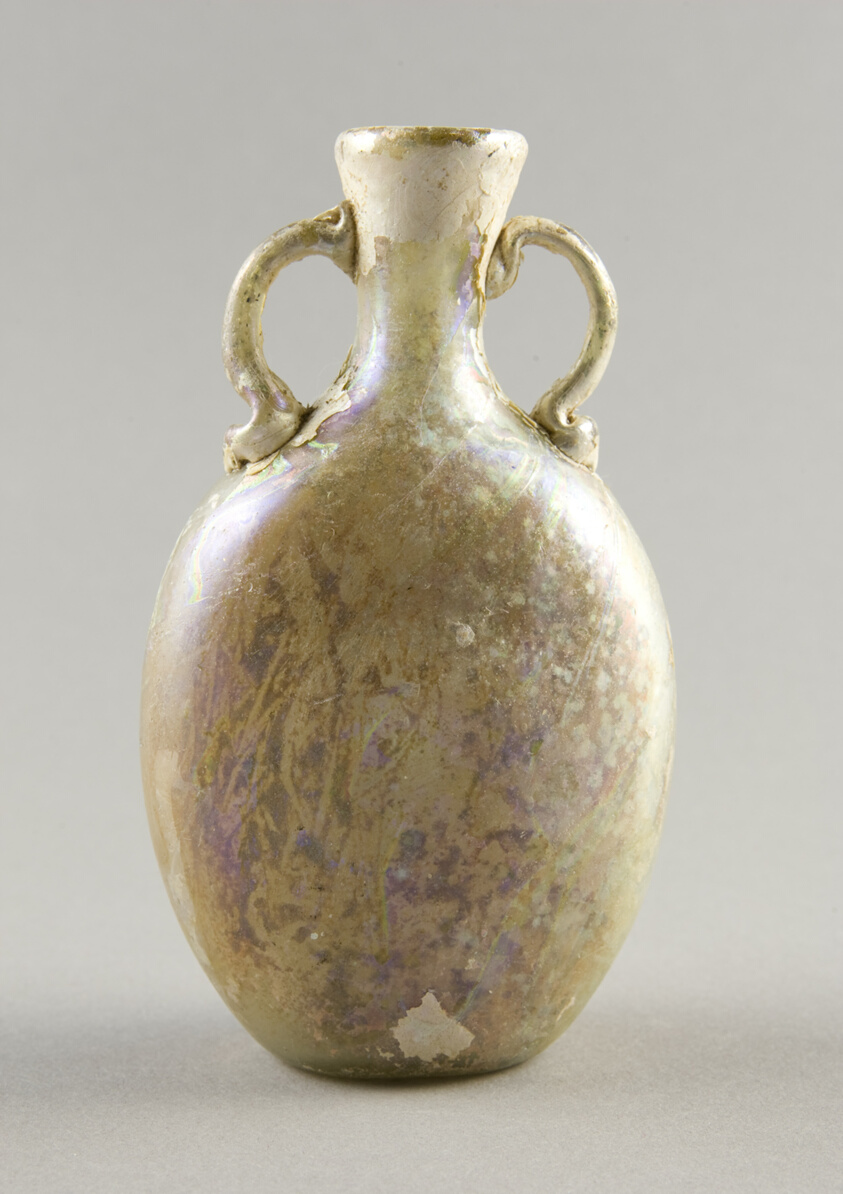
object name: Vessel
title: Flask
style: syrian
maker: Roman; Levant or Syria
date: 2nd-3rd century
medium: Glass, blown technique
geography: Syria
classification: glass; vessel; ancient art